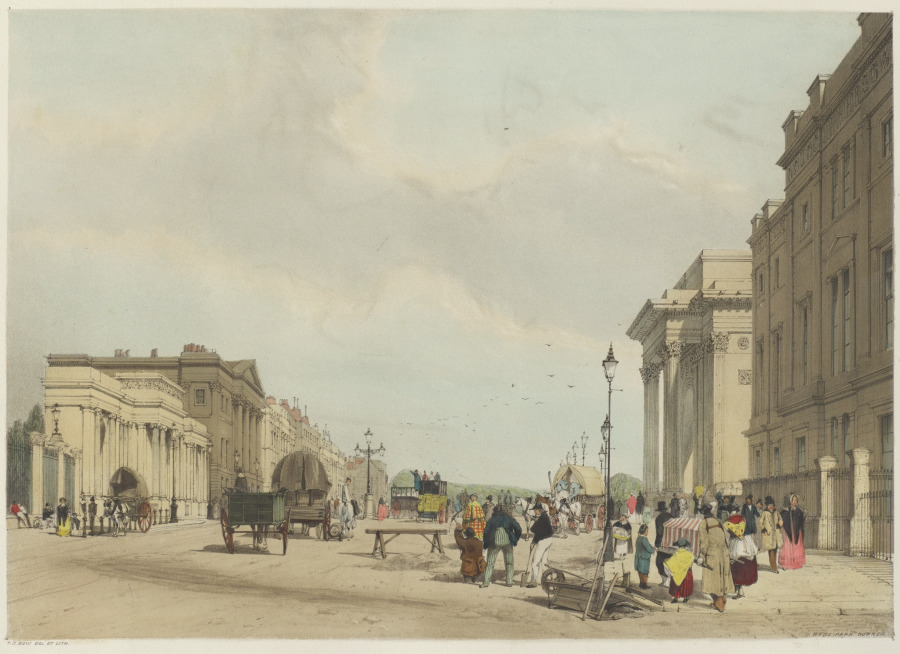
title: London As It Is: Hyde Park Corner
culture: England, 19th century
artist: Thomas Shotter Boys (British, 1803–1874)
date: 1842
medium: lithograph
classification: Bound Volume